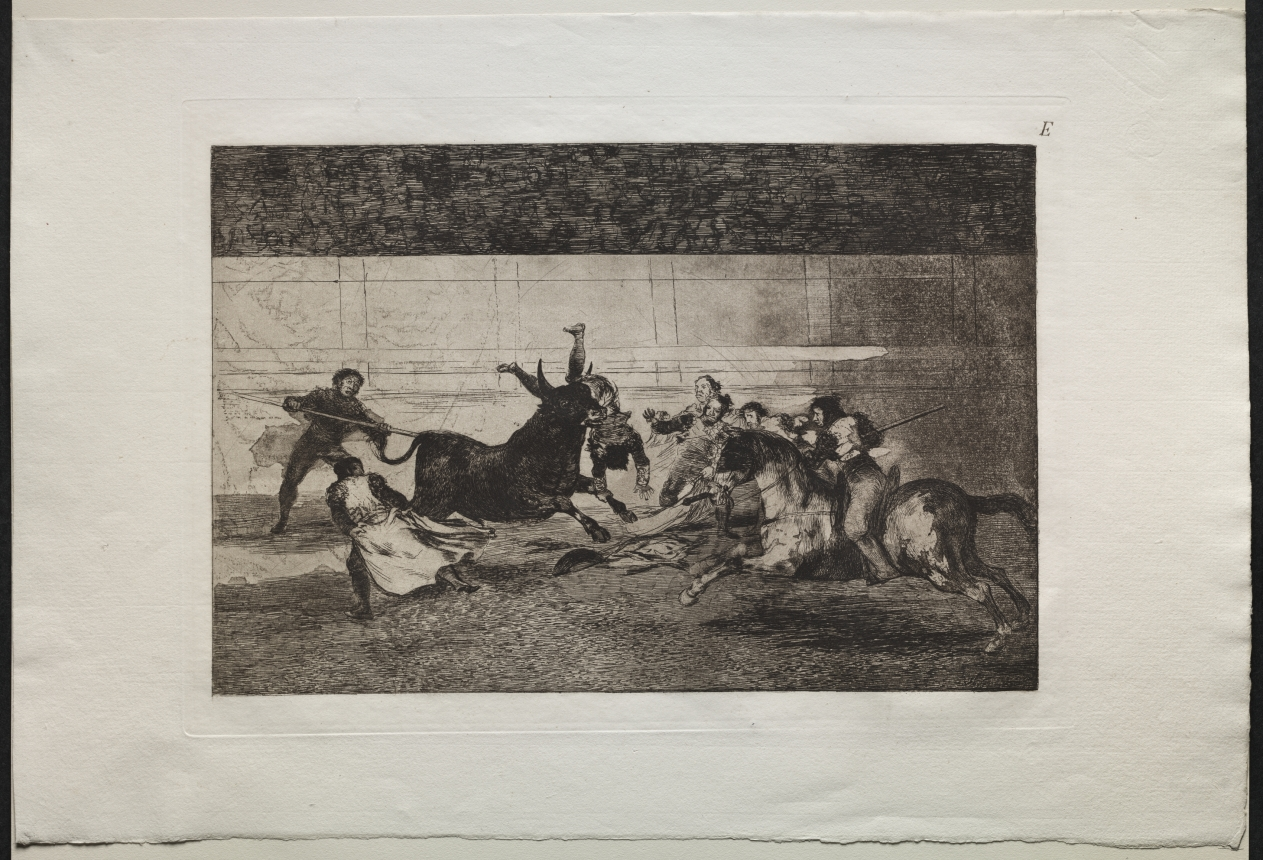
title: Bullfights: The Death of Pepe Illo (2nd Composition)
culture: Spain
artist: Francisco de Goya (Spanish, 1746–1828)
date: 1816, printed 1876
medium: engraving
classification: Print